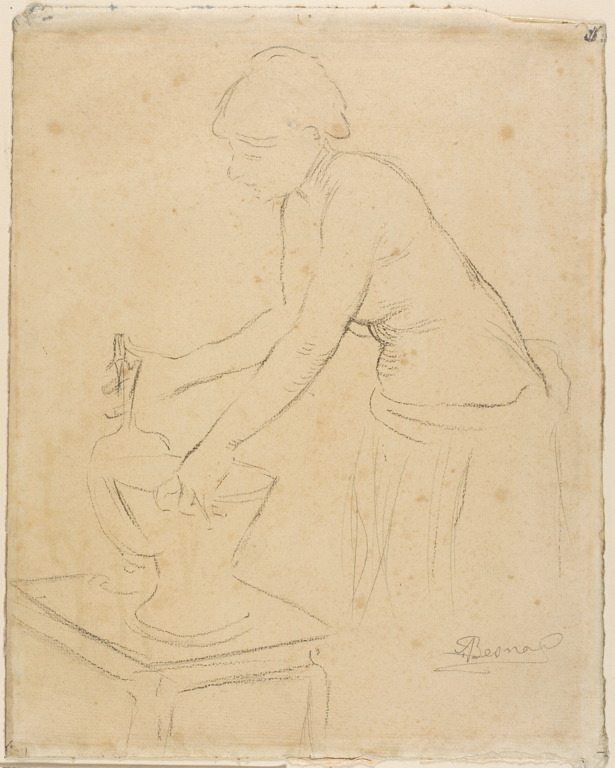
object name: Drawing and Watercolor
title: Woman at Her Toilette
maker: Albert Besnard (French, 1849-1934)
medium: Charcoal, on ivory laid paper, discolored to tan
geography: France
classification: charcoal; drawings (visual works); prints and drawing